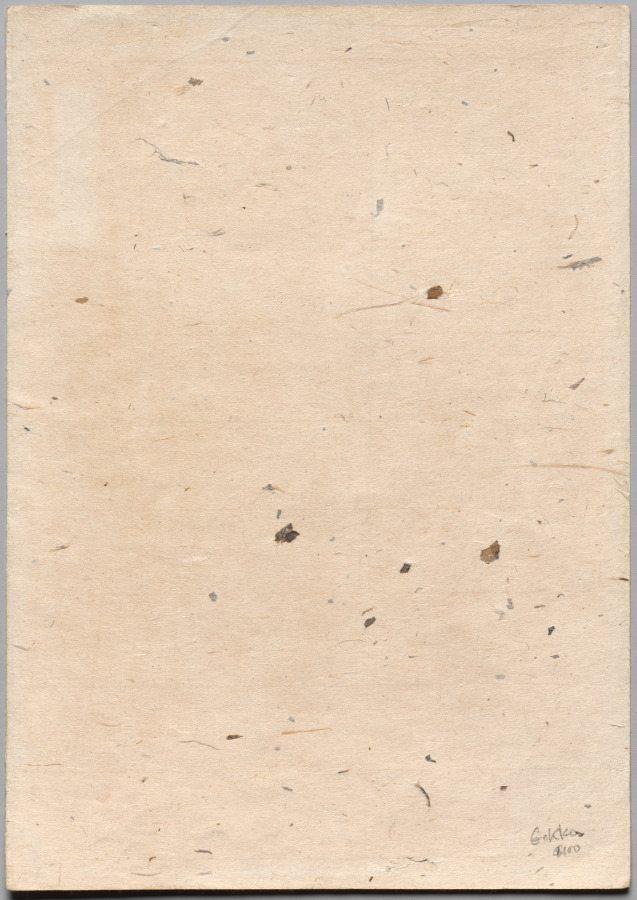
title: True View of Benten at Inokashira from the series Gekkō’s Miscellaney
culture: Japan, Meiji period (1868–1912)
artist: Ōgata Gekkō (Japanese, 1859–1920)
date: c. 1886–1899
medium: Woodblock print, ink and color on paper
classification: Print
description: The print series Gekkō’s Miscellaney wanders through a variety of genres. This print captures a view of a famous place in Tokyo, Inokashira, associated with the water deity Benzaiten. Ōgata Gekkō distinguished himself as a younger artist in the first exhibition of the Painting Appreciation Society (Kangakai) in 1885. He went on to earn prizes at world’s fairs and expositions in both the US and Europe.